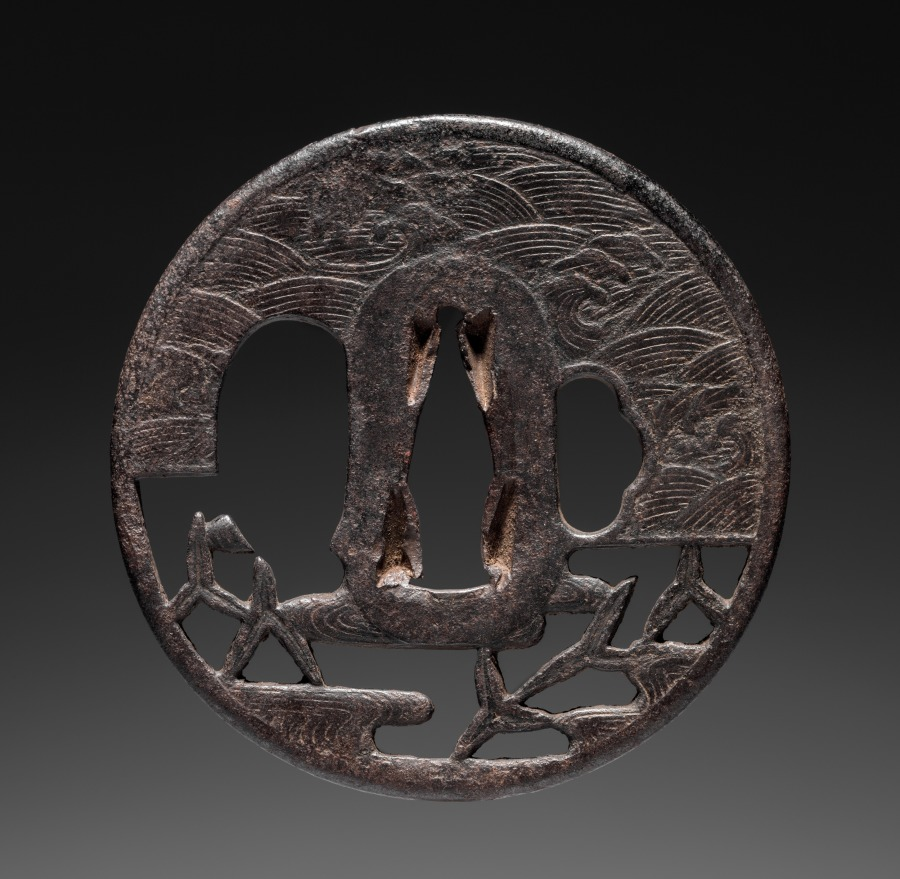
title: Sword Guard (Tsuba)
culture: Japan, possibly Edo period (1615-1868)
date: c. 1615–1868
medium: iron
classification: Arms and Armor